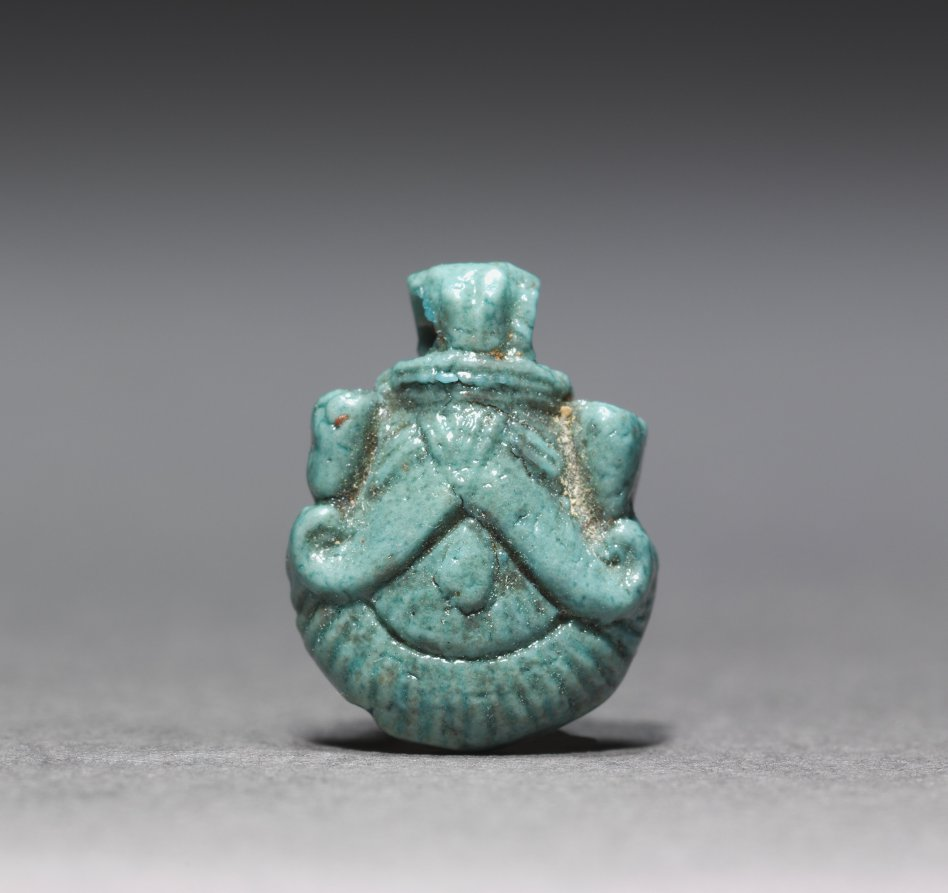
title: Amulet of a Palmette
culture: Egypt, New Kingdom (1540–1069 BCE), Dynasty 18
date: 1540–1296 BCE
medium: pale blue faience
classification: Amulets